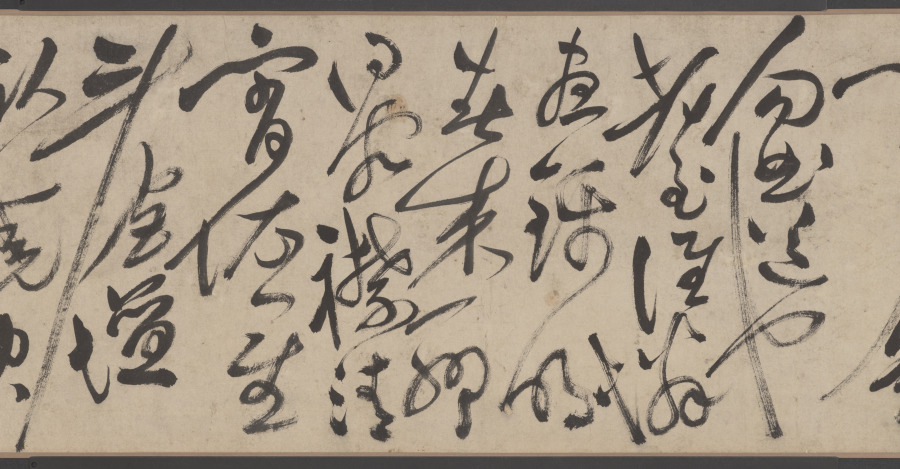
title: Retreat on an Autumn Day, in Cursive Script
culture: China, Ming dynasty (1368–1644)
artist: Zhu Yunming (Chinese, 1460–1527)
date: dated 1523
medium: Handscroll; ink on paper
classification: Calligraphy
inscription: 款識：讌於從一堂，爛漫醉書。癸未（1523）七月晦日也。枝山允明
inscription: 《閒居秋日》逃暑應能蹔閉關，未消多把古賢攀。並拋杯酌方為懶，少事篇章恐礙閑。風墮一庭鄰寺葉，雲開半面隔城山。浮生只說潛居易，隱比求（脫「名」）事更艱。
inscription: 《句曲道中》老至誰憐晝錦明，春來聊得客襟清。宵依星斗宮壇臥，曉（脫「入」）神仙宅舍行。眼看山多城郭少，肩挑詩重簿書輕。何時總入煙霞去。不見人間寵辱驚。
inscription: 《登茆峰》下馬門前一振衣，翠微高迥逼清微。雲端洞裡仙人過，月下山中長史歸。金焰暈牀砂氣伏，紫雲穿竇朮芽肥。神方能詠不能遇，一夜爽靈峰外飛。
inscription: 鈐印：「晞哲」、「允明」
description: This masterwork of calligraphy by Zhu Yunming from Suzhou combines two poems by the artist in cursive script style, characterized by its uninhibited, swift, and intuitive brushwork, so powerful that it here dissolved characters into dots or lines. Written from right to left and top to bottom and alternating in light dry to deep saturated ink, single characters may take a whole column or extend into the next one. Following the movement of the brush, they seem to dance over the paper.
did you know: Zhu Yunming stated that he was in an inebriated state when he created this work.